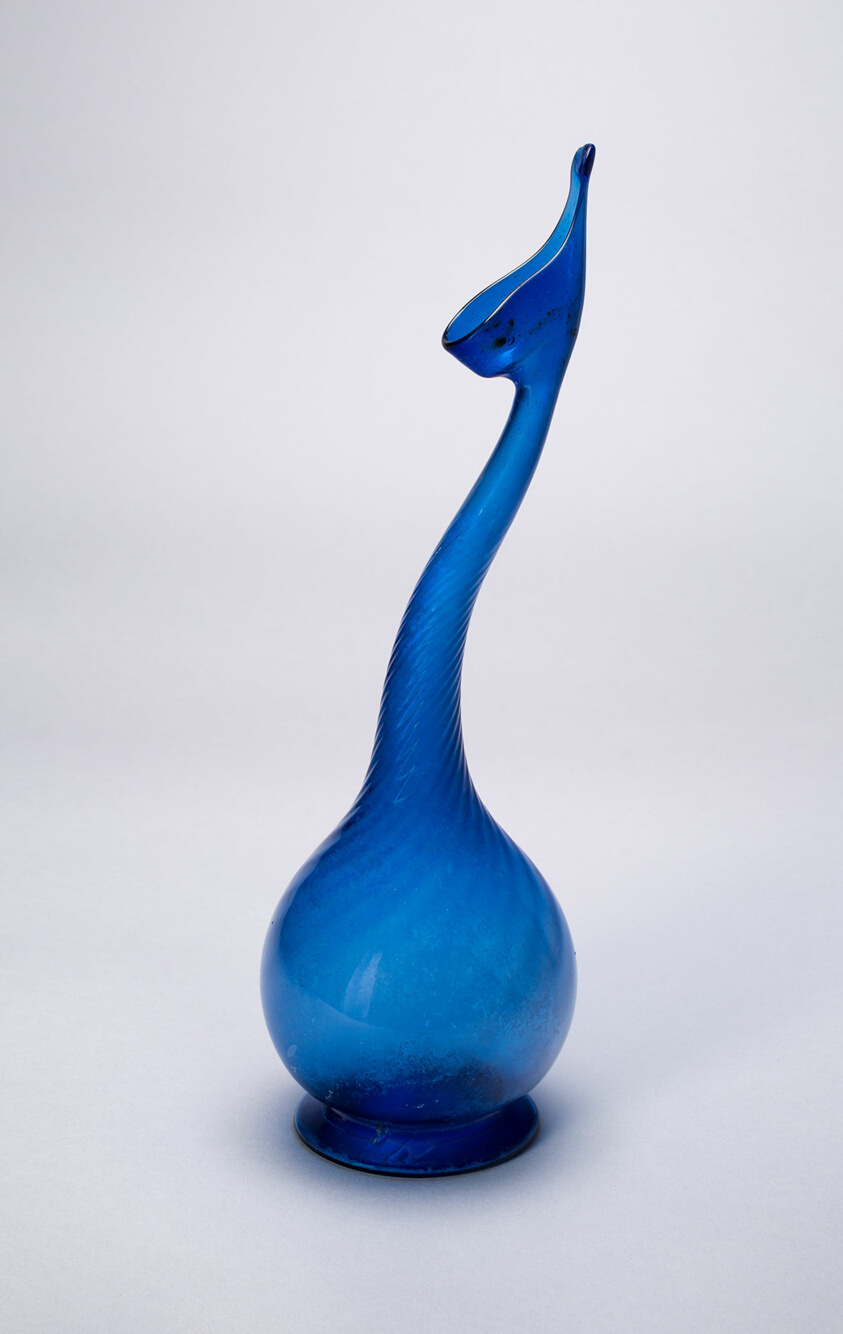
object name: Glass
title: Swan-Necked Flask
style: Islamic (culture or style)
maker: Iran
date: Qajar dynasty (1796–1925), 18th/19th century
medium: Glass, partially mold-blown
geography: Iran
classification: glass; asian art; vessel